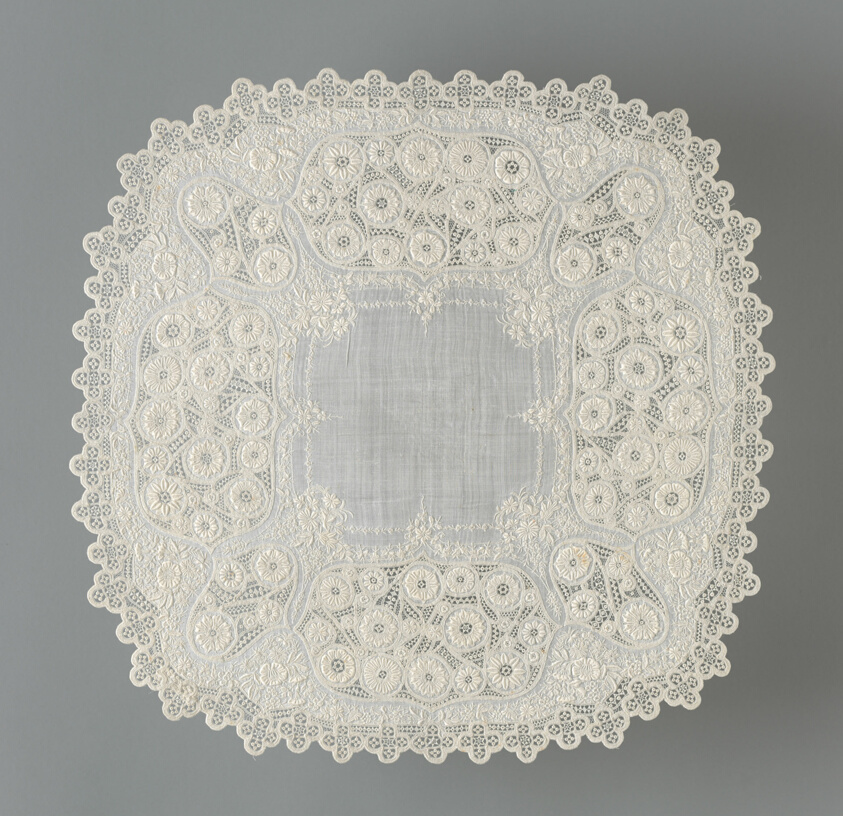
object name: Textile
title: Handkerchief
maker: France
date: 1825/75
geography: France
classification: textile; accessories (object genre); needlework (visual works); weaving